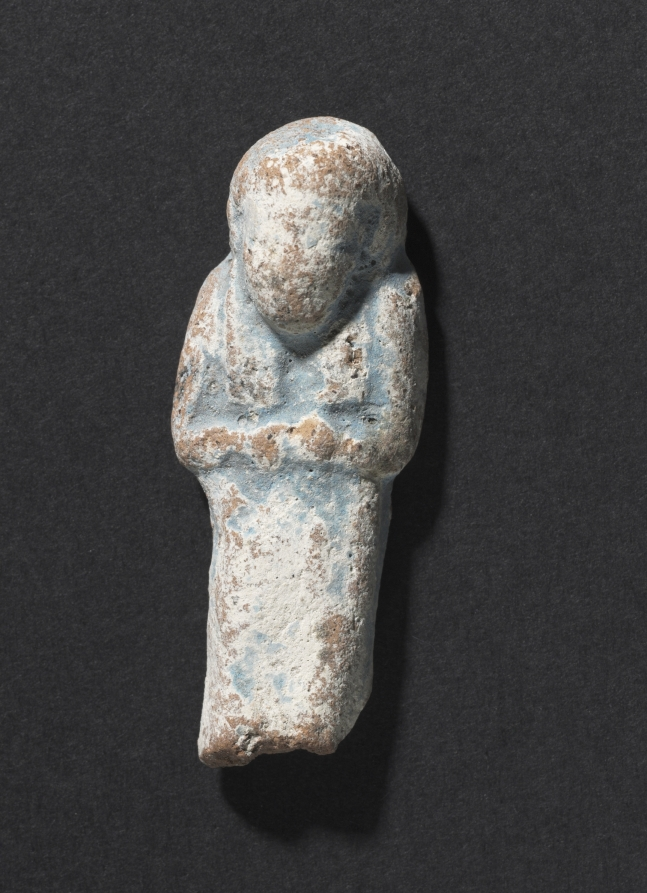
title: Shawabty of Ditamenpaankh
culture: Egypt, Late period (715–332 BCE), Dynasty 25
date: 715–656 BCE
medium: terracotta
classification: Funerary Equipment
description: High demand for shawabtys in the Late Period, a time when as many as 400 or more shawabtys were placed in the tomb with the deceased, gave rise to a specialized container for storing them: the shawabty box. This example is inscribed for the lady of the house, Ditamenpaankh, and was probably one of a pair originally made for her. The single-masted boat on the box's lid is perhaps an allusion to the pilgrimage of the deceased to the holy city of Abydos, the cult city of Osiris, king of the dead. The shawabtys inside are crude, mass-produced examples cast in an open mold. Made of terracotta, their blue paint imitates more costly shawabtys made of faience. As for the shawabty spell, it has been removed from its traditional location on the shawabty's front and relocated onto the sides of box, where it needed only to be written once, thus expediting production.